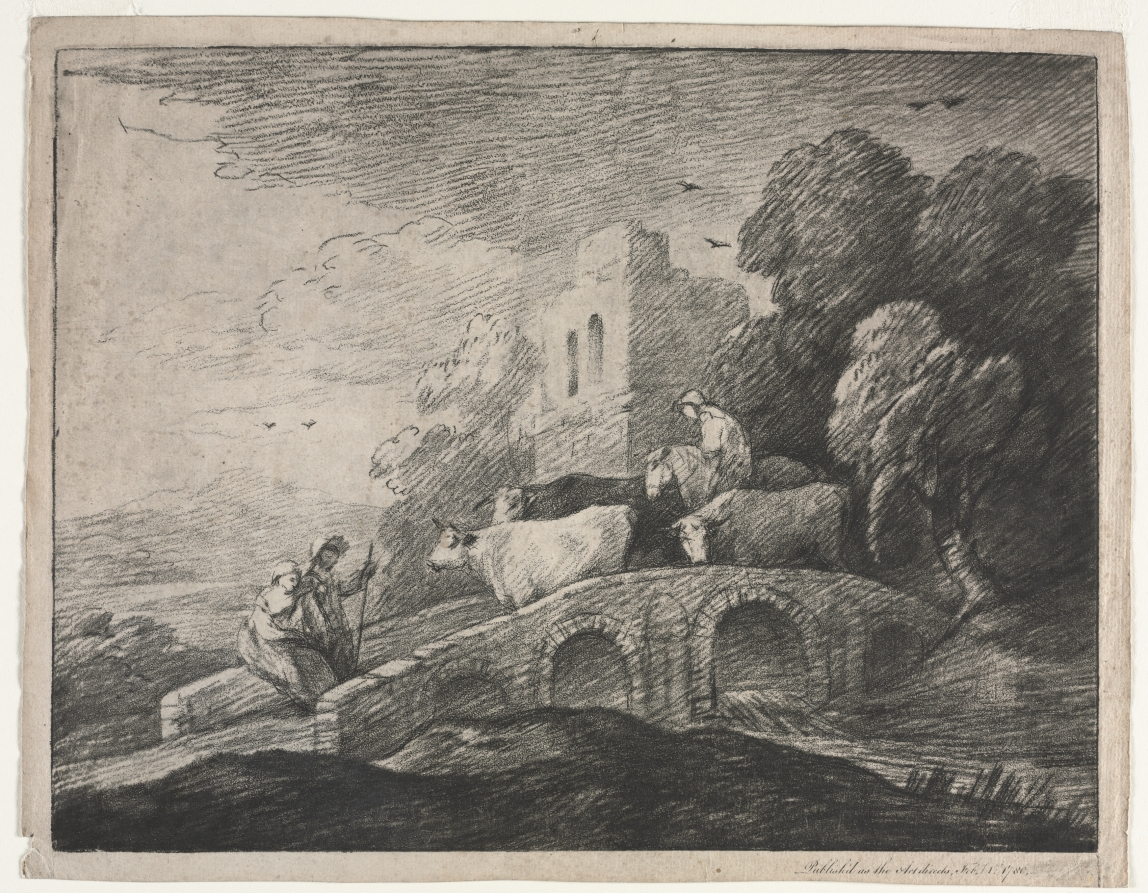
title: Wooded Landscape with Herdsmen Driving Cattle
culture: England, 18th century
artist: Thomas Gainsborough (British, 1727–1788)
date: 1779–1780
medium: etching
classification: Print